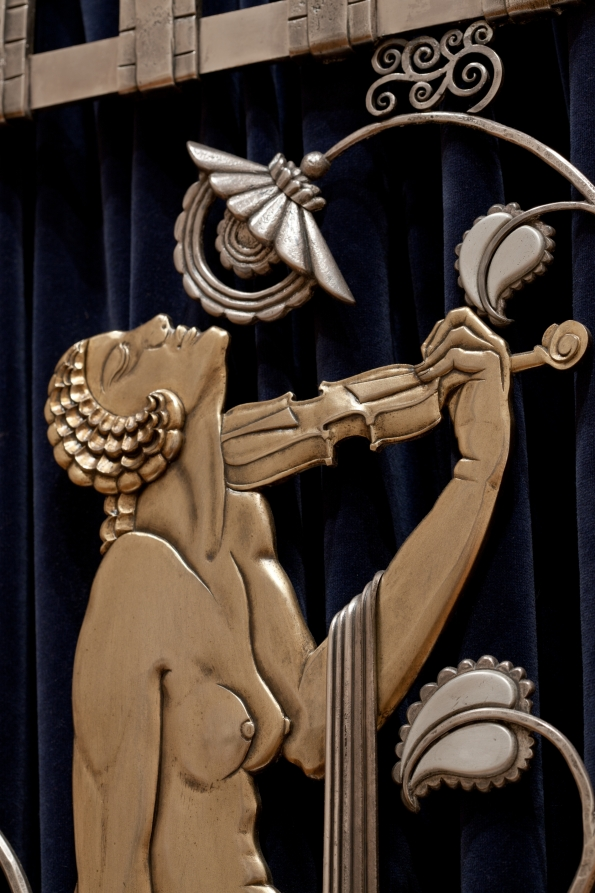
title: Muse with Violin Screen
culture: America, Ohio, Cleveland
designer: Paul Fehér (American, born Hungary, 1898–1990)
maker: Rose Iron Works (America, Ohio, Cleveland, est. 1904)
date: 1930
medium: Steel, brass; silver and gold plating, cotton velveteen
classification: Metalwork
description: Since the early years of the 20th century, the Rose Iron Works, a Cleveland supplier of architectural ornament, has produced distinguished metalwork. The company’s founder, Martin Rose, was born in Austria-Hungary and studied ornamental metalsmithing in Vienna prior to immigrating to Cleveland in 1902. In the 1920s, he hired a talented young Parisian designer, Paul Fehér, to work for the firm. Fehér’s designs, culminating in this massive screen, brought a modern European sensibility to the Rose Iron Works production. With its geometric patterning, highly stylized and abstracted natural forms, and the central figure reminiscent of the celebrated jazz singer Josephine Baker, this screen reflects the classic motifs of Art Deco design.